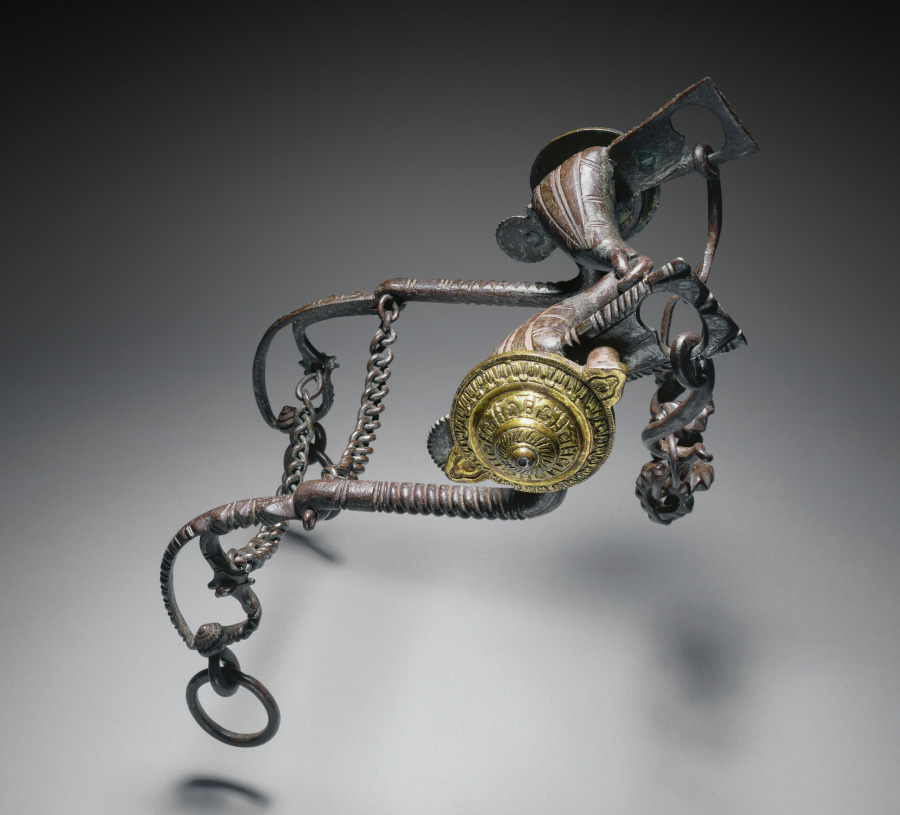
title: Curb Bit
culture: Italy, late 16th Century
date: c. 1580–1600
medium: iron with gilt bronze bosses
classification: Arms and Armor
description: A well-constructed curb bit was an essential piece of equipment for keeping a powerful battle stallion under control. Like other horse trappings, bits were often elegantly fashioned and ornamented. This example has applied and gilded bosses.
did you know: A curb bit uses lever action, meaning that it multiplies the pressure applied by the rider.